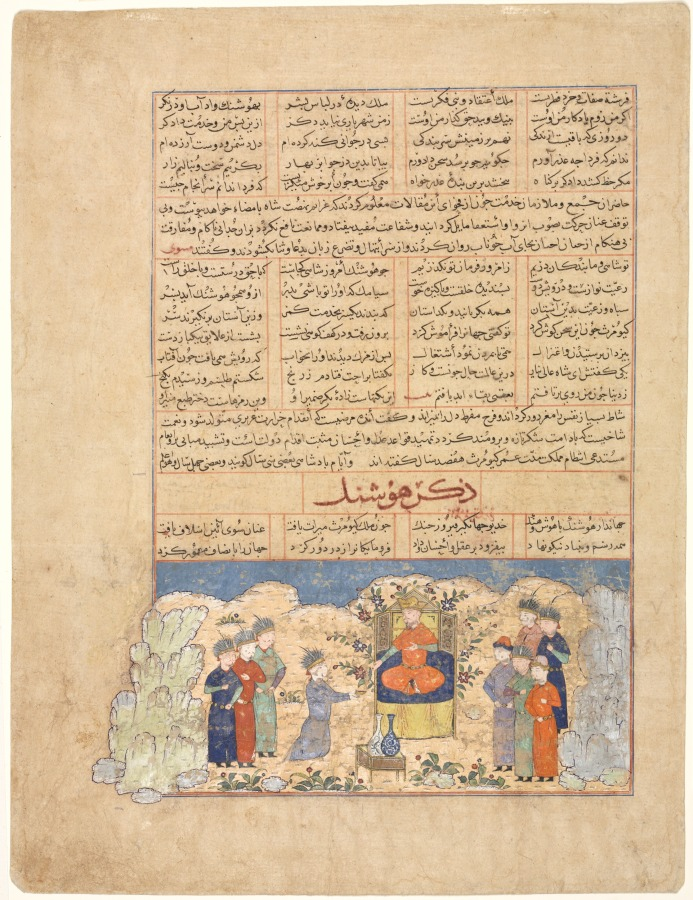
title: The Story of Hushang (recto), Illustration and text (Persian Prose) from Majmac al-Tavarikh (A Compendium of Histories) of Hafiz-i Abru; Text Page, Persian Prose, (verso), from Majmac al-Tavarikh (A Compendium of Histories) of Hafiz-i Abru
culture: Afghanistan, Herat, Timurid period (1370–1501)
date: early 1400s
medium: ink and opaque watercolor on paper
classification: Manuscript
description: These two pages are from a manuscript that evidently was written and illustrated for the library (at Herat) of the Timurid king Shah Rukh, the son of Timur (Tamerlane). The Majma' al-Tawarikh traced the history of the world, beginning with the prophets of the Old Testament until the reign of Shah Rukh.